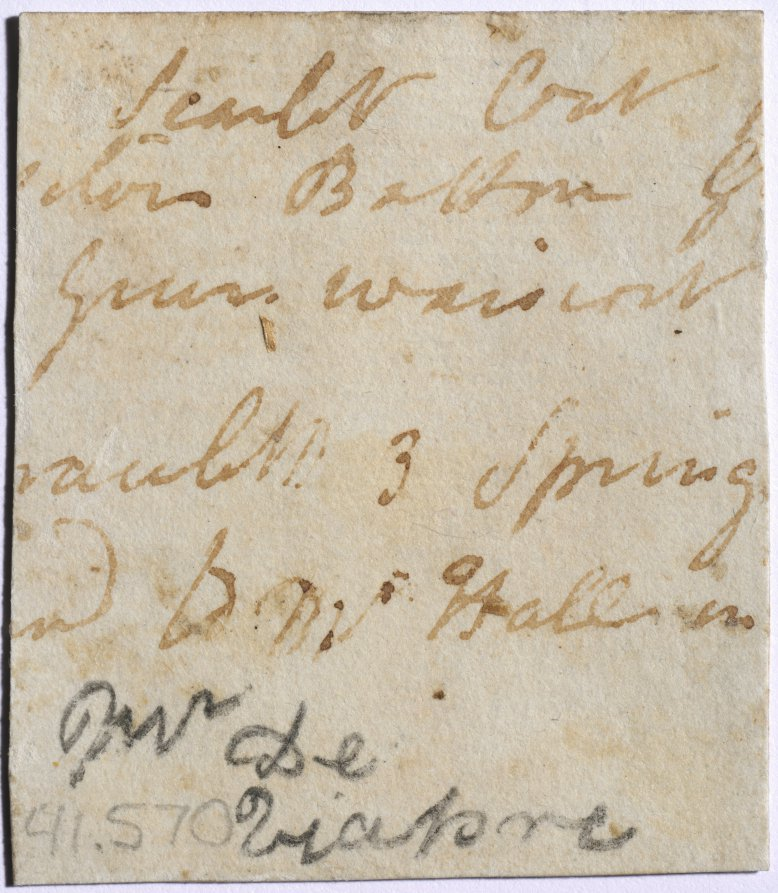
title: Portrait of M. de Viapre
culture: England, 18th century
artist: John I Smart (British, 1741–1811)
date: c. 1776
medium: graphite and wash on laid paper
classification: Portrait Miniature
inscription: Signature: none; inscribed on paper backing in graphite, upside down at upper left: 196; also on paper backing on slant at center, in graphite: Sir ?/John/Lester and 11; inscribed on back of drawing, under paper backing in graphite at bottom: Mr De [G?]iaf . . .; and in brown ink from top to bottom: Scarlet Coat . . . der Bottom [or possibly button]. . . green waistcoat . . . racelet & Spring [deli]vrd to Mr. Hall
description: Although it is impossible to say if it was always part of the artist’s process to execute a preparatory sketch prior to painting each miniature, we do know that John Smart retained many hundreds of these sketches. A group of preparatory sketches—of which this portrait is one—descended through the Smirke family after Smart’s daughter Sarah gave a sketchbook containing preparatory portrait studies to her friend Mary Smirke, sister of the celebrated Victorian architect Sydney Smirke. This book was probably broken up around 1877 when it was divided between Sydney’s daughters Mary Jemmett and Mrs. Lange, whose portions were both sold at auction in 1928. G. C. Williamson was the first to suggest that Smart’s sketches were well known and that they were preparatory studies for the painted miniatures. Williamson listed the names of sitters from the sketches known to him at the time, and they include Sir John Lester, the title formerly given to the sketch here. This designation was applied only to a paper backing that had been attached after the drawing had been removed from the sketchbook. There is no further evidence for this attribution, however. This sketch presents only the sitter’s head, with a slight suggestion of a high stock collar. His head faces to the left, and his light hair is combed straight back with a flat curl above the right ear. He has gray eyes, and the background is unpainted. The work can be dated to around 1776 because of its size, which, when painted on ivory, would have been around 2 inches high. An inscription on the back of the drawing was discovered when the paper backing was removed in 1993. It is a fragment of a larger inscription, from which it has been cut. It is partly illegible but suggests that the work was intended to be set in a bracelet, and it gives some information about how the sitter was to appear in the finished miniature, including the description “scarlet coat . . . green waistcoat.” This combination of colors might seem almost flashy, but it appears elsewhere in Smart’s work. These details seem to have been written in Smart’s hand, while the graphite inscription below—“Mr. De [?]”—was probably written later in another hand. Miniatures expert Arthur Jaffé remarked in 1948 that this portrait probably depicted John Lester of Poole, Dorset, who was knighted in 1802. However, this identity was based solely on the inscription on the later paper backing that Jaffé did not have the opportunity to see removed to reveal the inscription in Smart’s hand on the back of the drawing itself. There are no portraits of Sir John Lester known, and to this date, the finished ivory for which this preparatory sketch was presumably undertaken has not been discovered.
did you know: Sketches helped John Smart work out the particulars of a portrait before commencing the miniature on ivory; they were useful in the event that a duplicate might later be required.